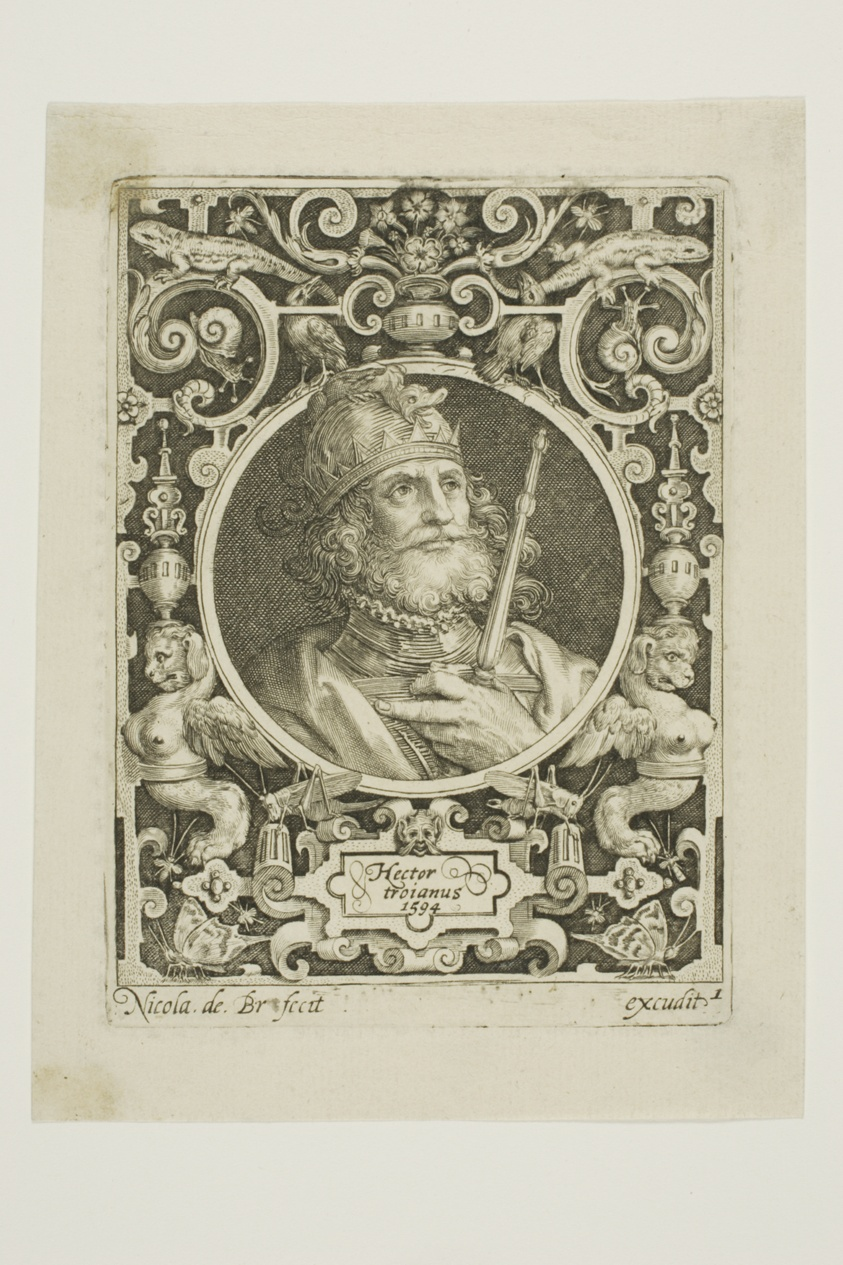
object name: Print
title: Hector of Troy, plate one from The Nine Worthies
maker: Nicolaes de Bruyn (Flemish, 1571-1656); published by Assuerus van Londerseel (Flemish, 1572-1635)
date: 1594, reworked second state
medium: Engraving in black on cream laid paper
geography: Flanders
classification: engraving; prints and drawing; print